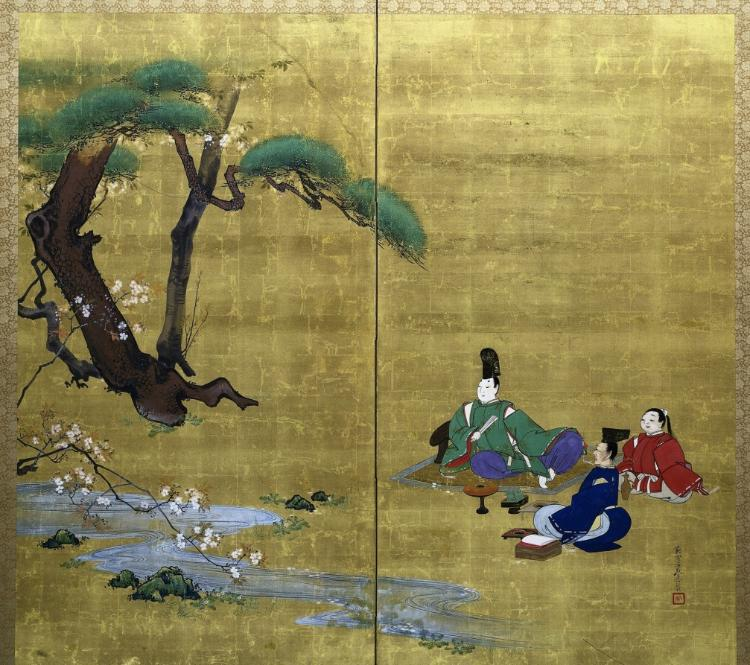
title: Nagisa Palace from the Tales of Ise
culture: Japan, Edo period (1615–1868)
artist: Shibata Zeshin (Japanese, 1807–1891)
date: late 1800s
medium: Two-panel folding screen; ink, color, lacquer, and gold on silk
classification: Painting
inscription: signed: Tairyuko Zeshin sei; sealed: Furumitsu.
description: This screen depicts an episode from the Tales of Ise, a 10th-century collection of poems and associated narratives in which the main character composes the following poem while drinking sake and viewing cherry blossoms: If, in this world of ours / All the cherry blossoms / Disappeared / The heart of spring / Might find peace. Our hero relaxes on a shoulder rest, gazing at the flowers, his sake dish before him on a lacquered stand. A plump boy attendant monitors the sake dishes, a ewer at the ready. An associate sits with paper, ink, and brush, poised to record poems.